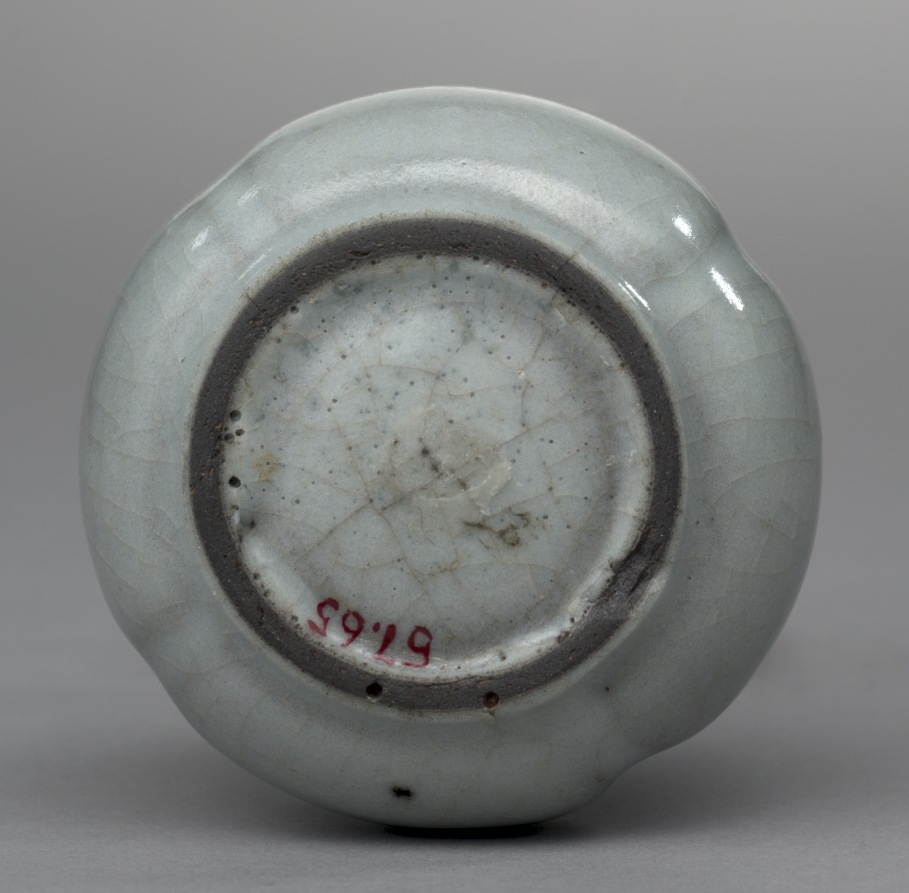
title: Arrow-Holder Vase (Jianhu)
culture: China, Zhejiang province, Hangzhou, Southern Song dynasty (1127-1279)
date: 1200s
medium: porcelaneous stoneware, Guan ware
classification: Ceramic